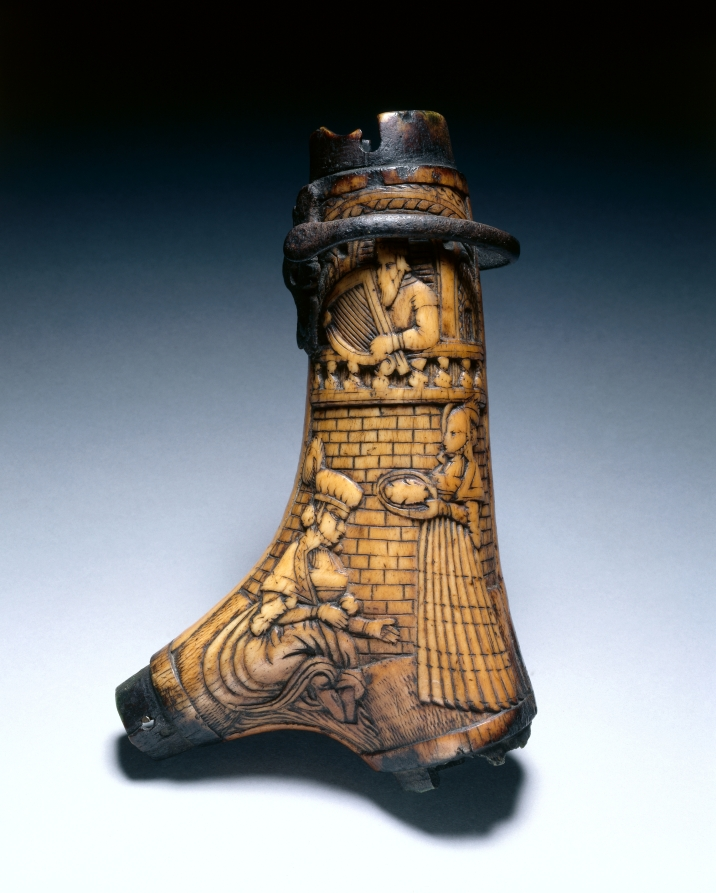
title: Powder Flask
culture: Germany, late 16th Century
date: c. 1580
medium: staghorn (two branches) carved with relief, scene of David and Bathsheba; iron suspension loop; mounts missing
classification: Arms and Armor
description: Powder flasks are small, portable containers designed to hold gunpowder. From the 1400s to the 1800s, powder flasks were indispensable for charging and priming firearms of all types. Without powder flasks firearms were of little use to their owners. Many highly decorated flasks rank as works of art. During the 1500s, they were frequently decorated with images of famous historical figures. Here the figures of King David and Bathsheba derive from the Old Testament.